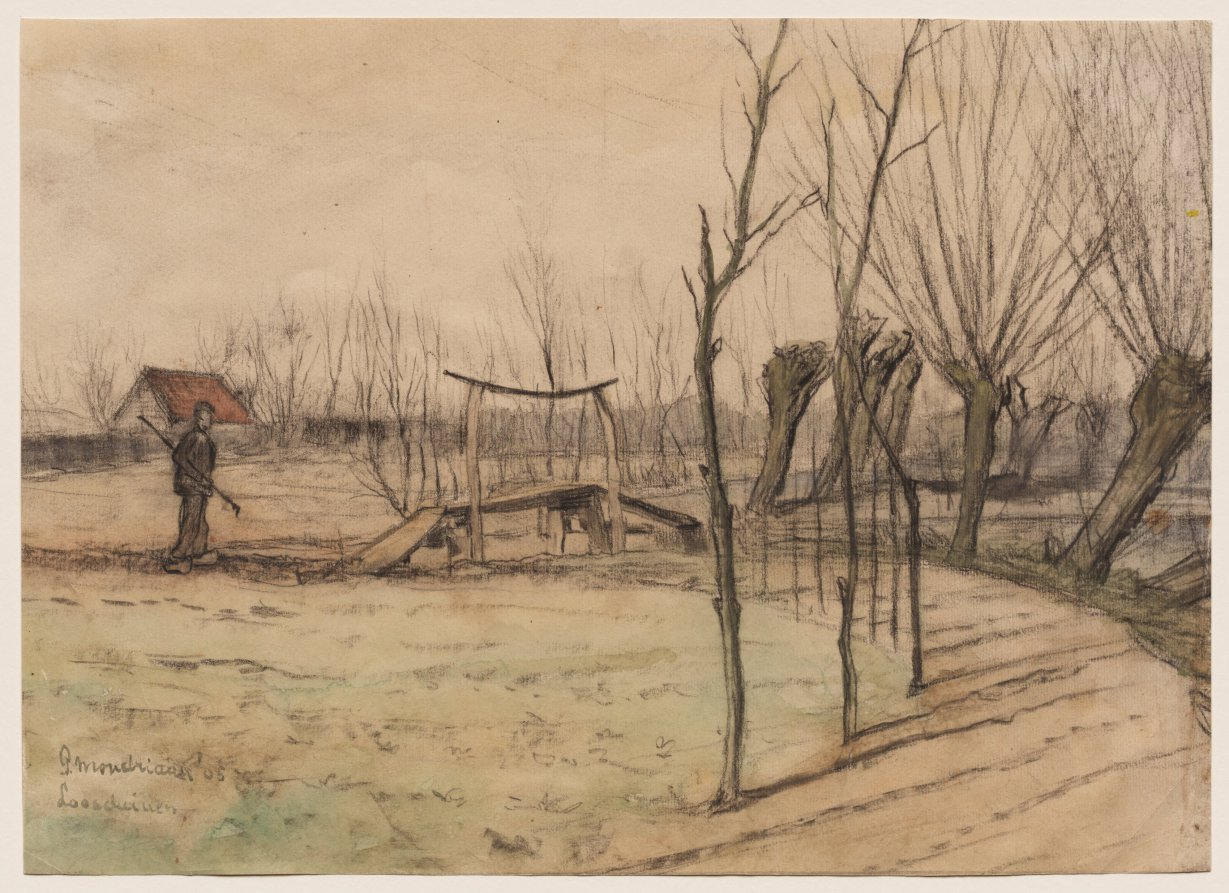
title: Landscape at Loosduinen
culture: Netherlands, early 20th Century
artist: Piet Mondrian (Dutch, 1872–1944)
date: 1905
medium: black chalk (extended with water in places), watercolor, and gouache; framing line in graphite (bottom edge)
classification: Drawing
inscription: signed, lower left, in watercolor: P. Mondriaan '05 / Loosduinen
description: Although Mondrian is best known for his De Stijl paintings and as a founder of modern, abstract art, he began as a landscape and figurative artist. Between 1897 and 1907, he executed about fifty landscapes each year, comprising nearly half of his entire oeuvre. In 1905, a large exhibition of Vincent van Gogh’s work was held at the Stedelijk Museum in Amsterdam. The spindly, bare trees, low horizon, and the lone peasant in Landscape at Loosduinen reveal the influence of the Dutch master upon Mondrian. The drawing’s degree of finish suggests that it was either done on commission or intended for exhibition and sale.